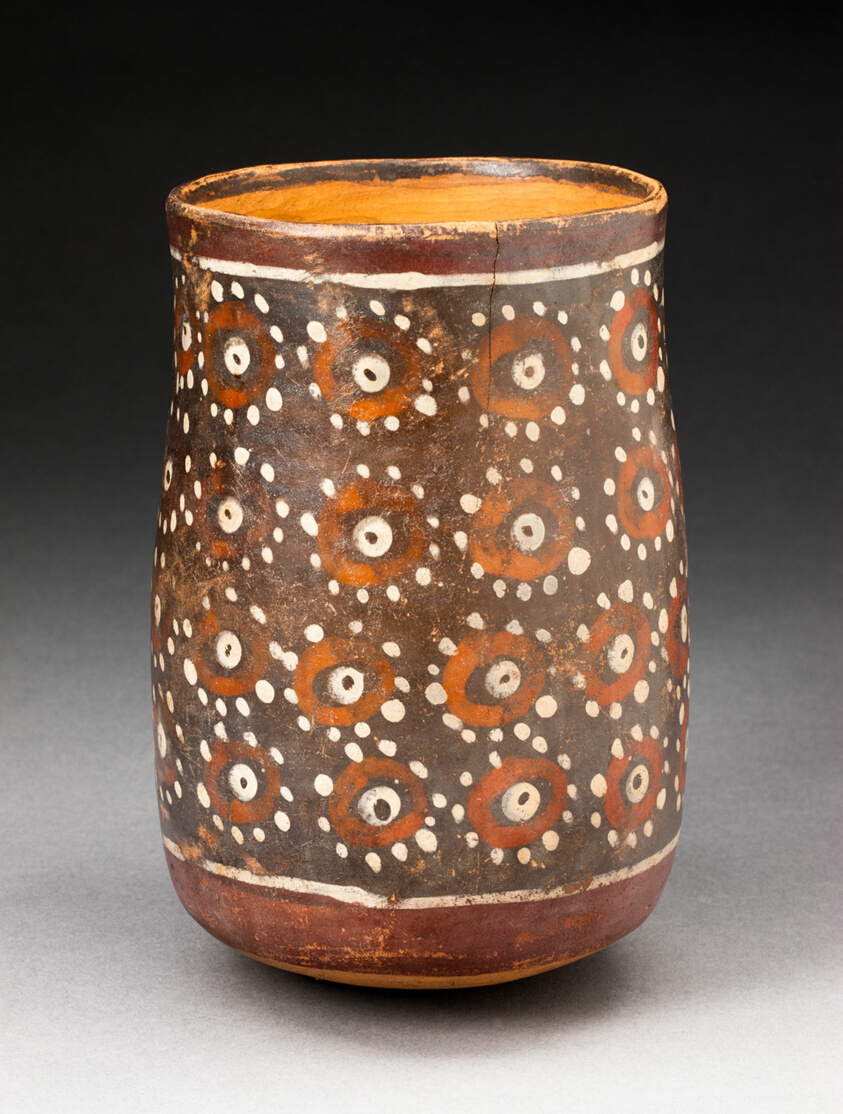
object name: Vessel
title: Beaker with Repeated Circular Motif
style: nazca, early intermediate period, Pre-Columbian, americas, Arts of the Americas, andean, andes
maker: Nazca; South coast, Peru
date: 180 BCE–500 CE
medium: Ceramic and pigment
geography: Nazca Valley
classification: earthenware; art of the americas; ceramics; vessel